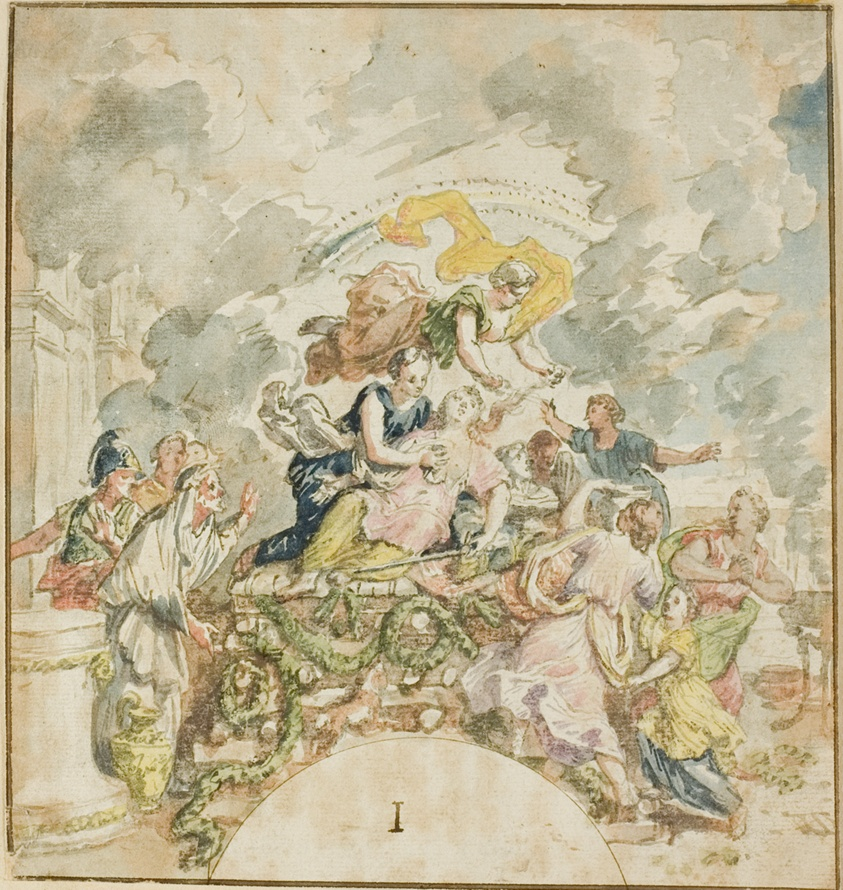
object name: Drawing and Watercolor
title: The Death of Dido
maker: School of Gerard de Lairesse (Flemish, 1640-1711)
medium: Watercolor, over traces of graphite, on ivory laid paper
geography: Flanders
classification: watercolor; drawings (visual works); prints and drawing